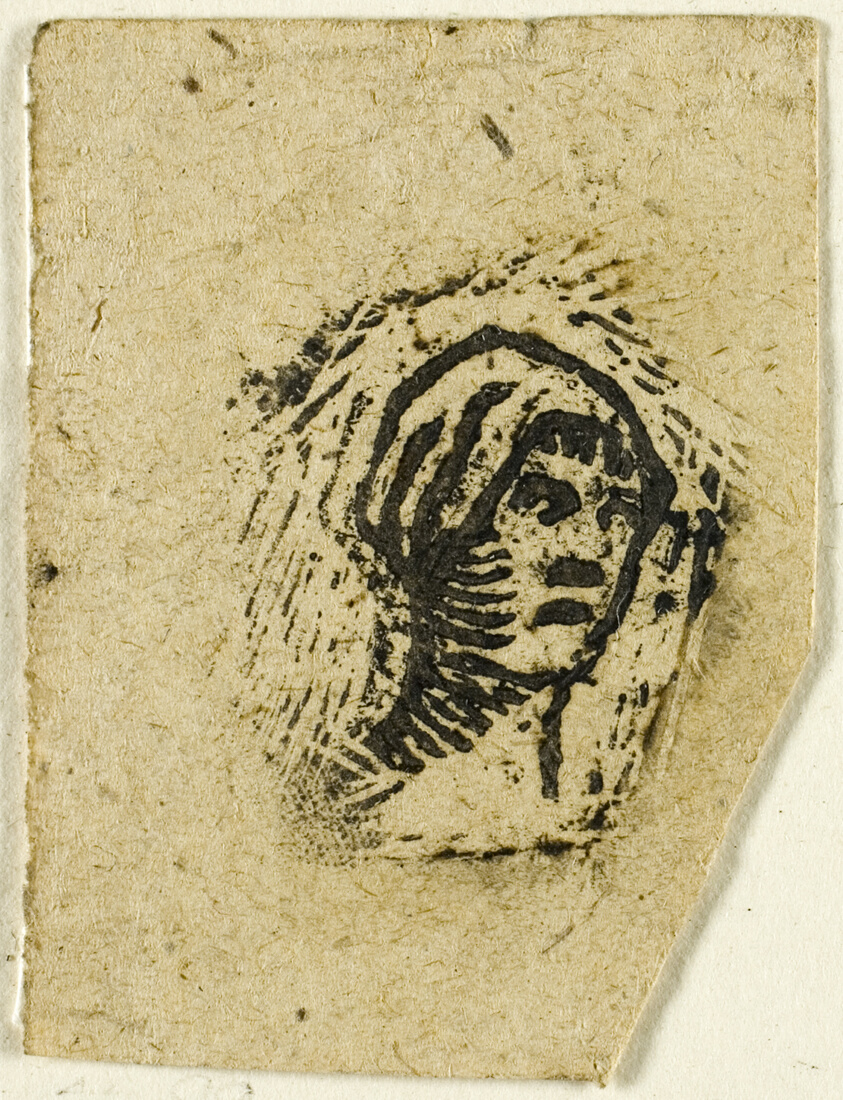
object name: Print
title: Sketches, Fragment: Head of a Woman Wearing a Kerchief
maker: Jean François Millet (French, 1814-1875)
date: after 1863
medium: Woodcut fragment from a partially printed block on tan wove paper with separate matting and original backing with inscription in dark brown ink on white wove lined card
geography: France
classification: woodcut; print; prints and drawing